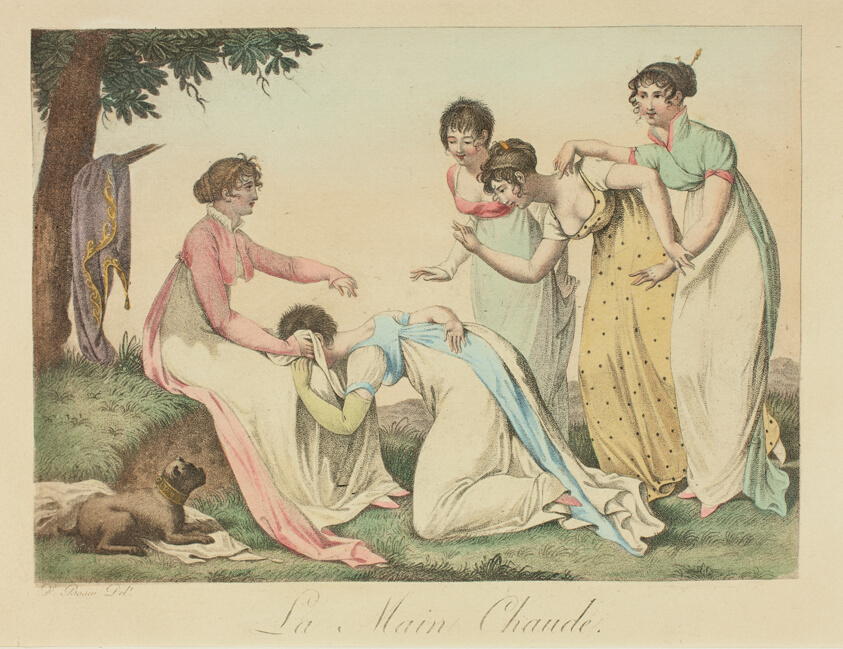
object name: Print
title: The Warm Hand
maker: Jean François Bosio (French, 1764-1827)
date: 1817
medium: Stipple engraving with etching, roulette, and hand-coloring, on heavy cream laid paper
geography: France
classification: engraving; print; prints and drawing